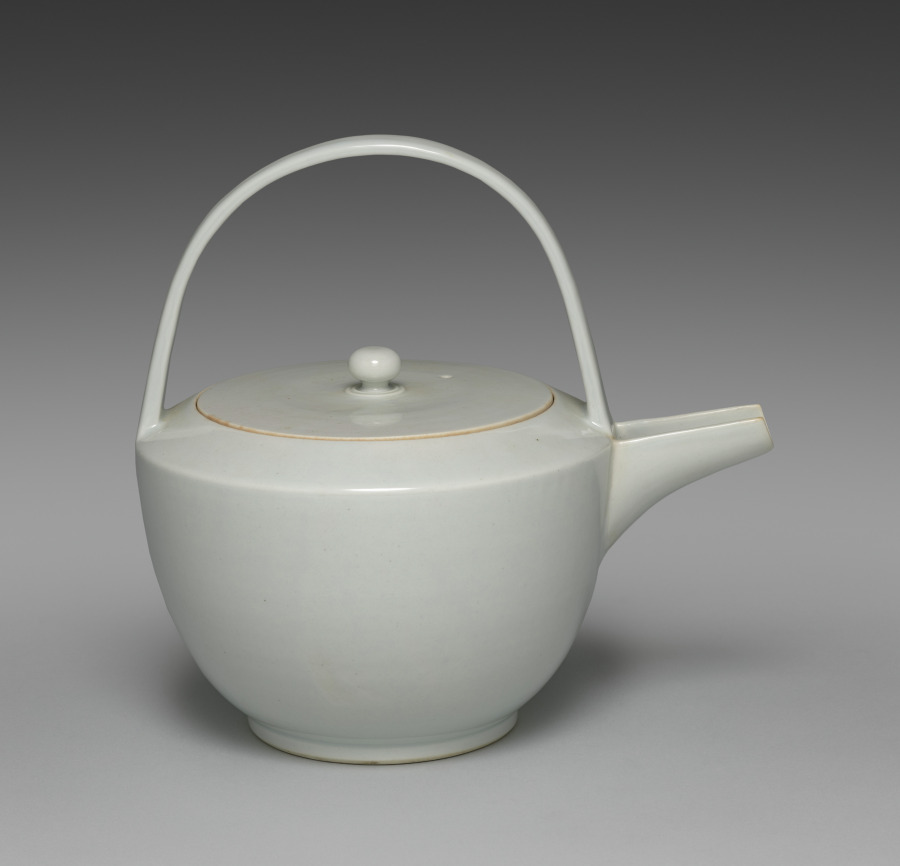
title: Sake Pourer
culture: Japan, Meiji period (1868–1912)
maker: Seifū Yohei III (Japanese, 1851–1914)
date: c. 1887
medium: Porcelain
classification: Ceramic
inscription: Artist's signature in underglaze blue on the base.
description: This sake pourer has a wide basin with a low foot; a generous spout open across the top half; a flat, round lid with a small knob recessed flush to the top of the container; and a tall, arched handle that meets the container where the top joins the basin at a sharp angle. This vessel is glazed but otherwise undecorated. Unlike the creamy white color of some Yohei III works, the white of this sake pourer has the bluish cast typical of porcelains produced in Kyoto.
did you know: Seifū Yohei III signed this sake pourer in underglaze blue on the base.